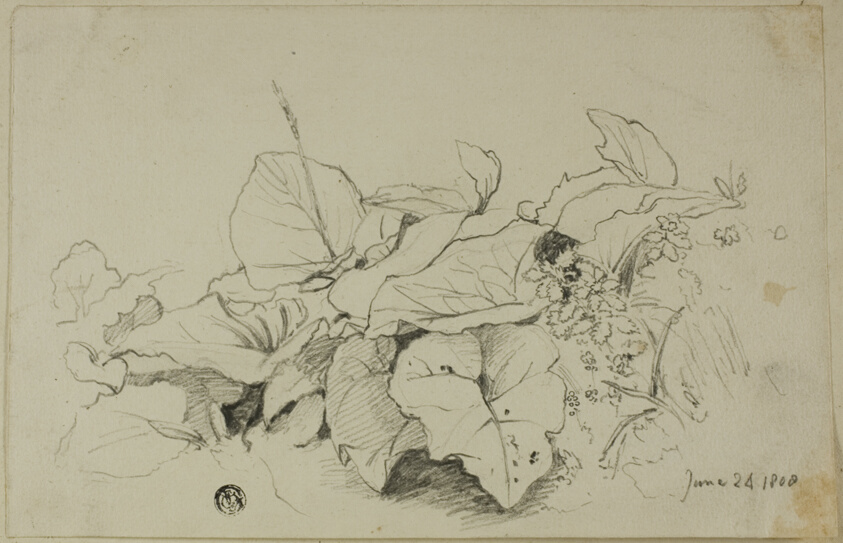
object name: Drawing and Watercolor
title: Clump of Leaves and Flowers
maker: Joshua Cristall (English, c. 1767-1847)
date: 1808/47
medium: Black chalk, on cream wove paper, tipped on cream wove paper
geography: England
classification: crayon; drawings (visual works); prints and drawing